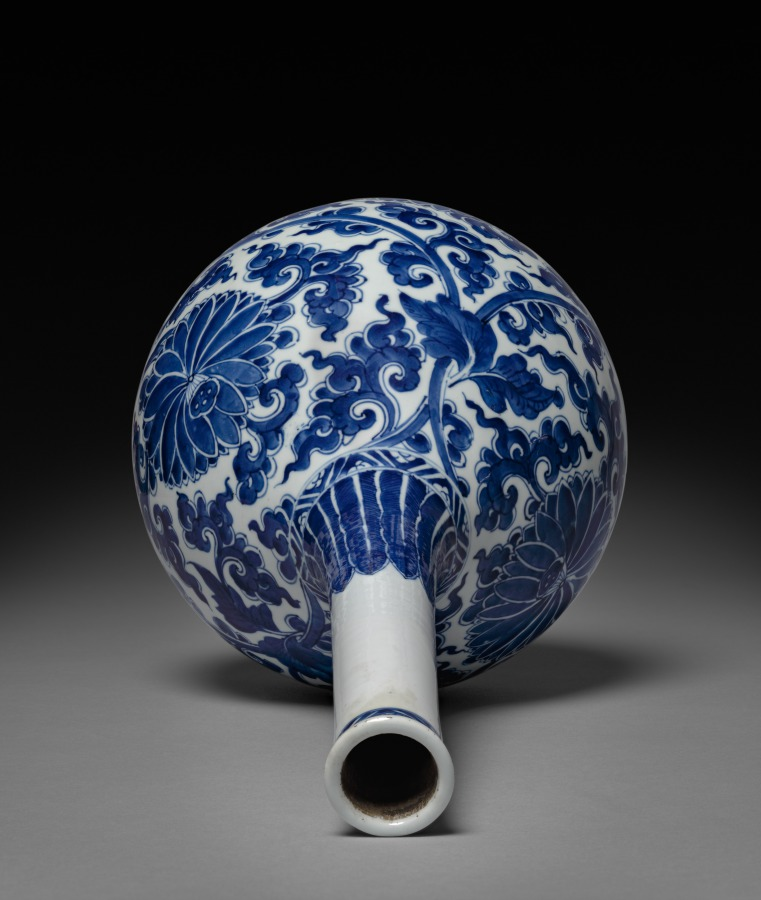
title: Bottle-shaped Vase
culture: China, Qing dynasty (1644-1911), Kangxi reign (1662-1722)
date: 1662–1722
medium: porcelain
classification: Ceramic